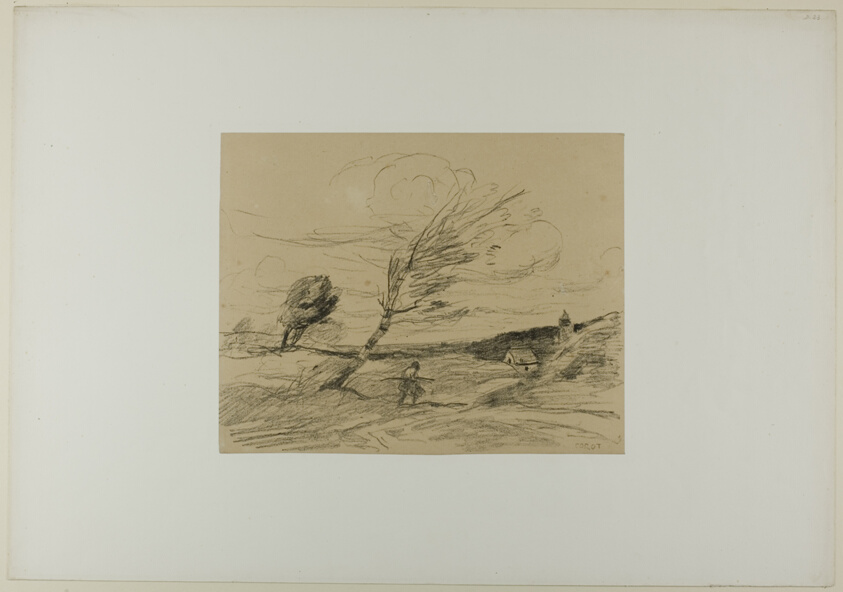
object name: Print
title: Gust of Wind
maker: Jean-Baptiste-Camille Corot; French, 1796-1875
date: 1871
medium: Transfer lithograph on tan China paper laid down on white wove paper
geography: France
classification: lithograph; print; prints and drawing